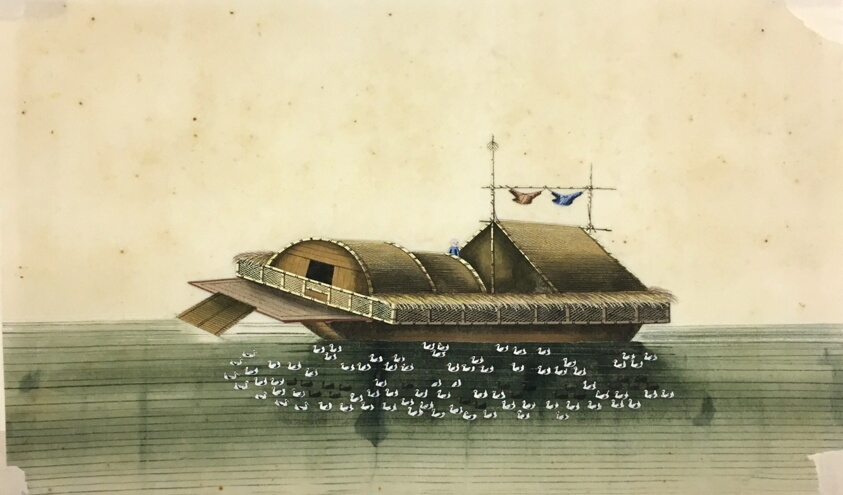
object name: Painting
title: Ship paintings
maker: China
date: mid 19th century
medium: Album of ten leaves; watercolor on paper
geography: Guangdong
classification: painting; asian art